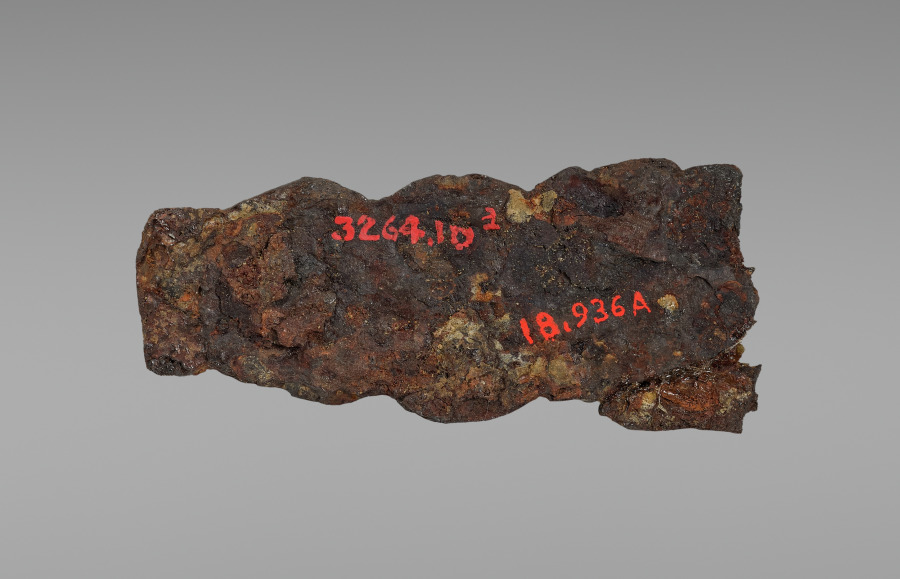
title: Buckle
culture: Merovingian, Burgundian, Migration period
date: 600s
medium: iron with silver overlay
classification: Jewelry